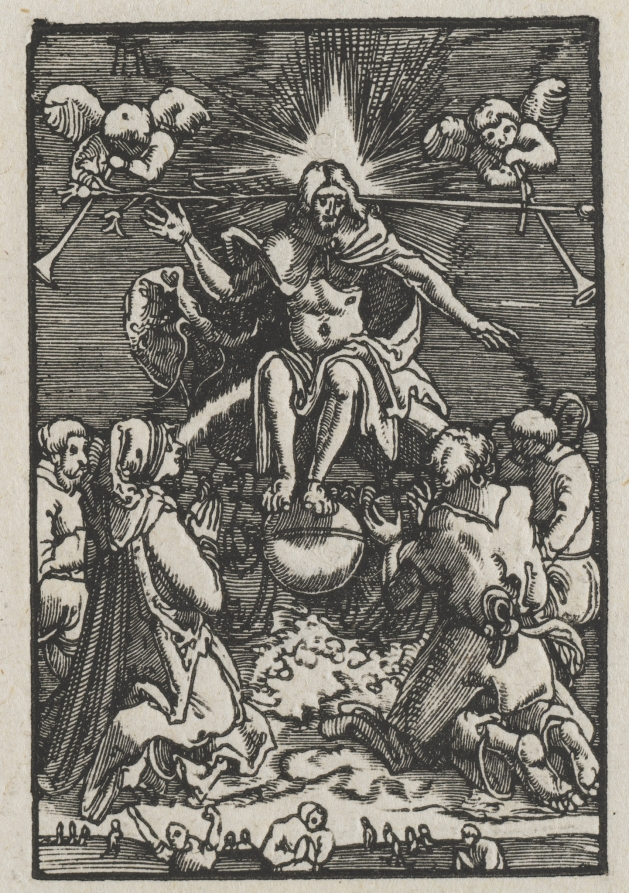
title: The Fall and Redemption of Man: The Last Judgment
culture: Germany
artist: Albrecht Altdorfer (German, c. 1480–1538)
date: c. 1515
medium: woodcut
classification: Print